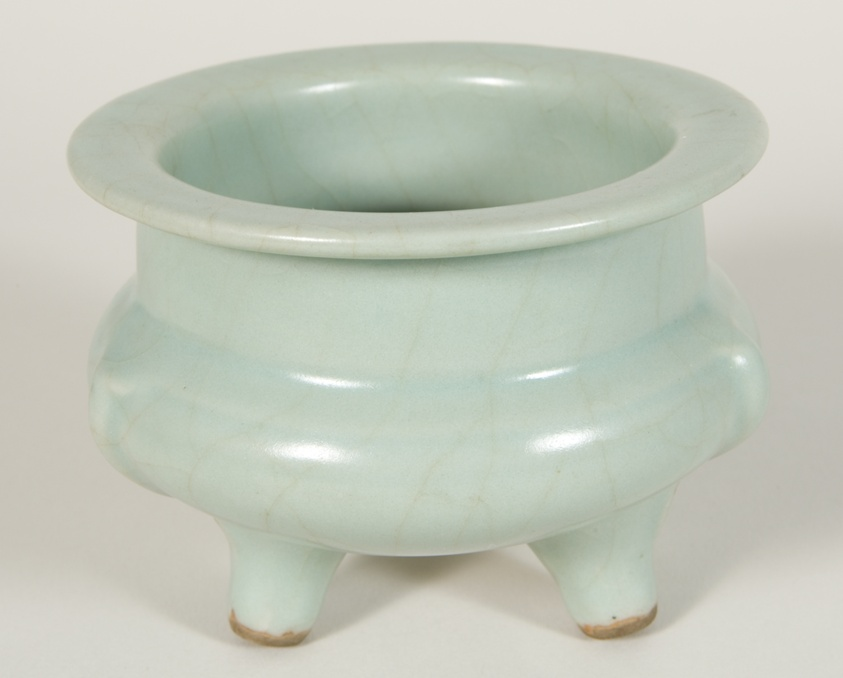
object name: Vessel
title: Cylindrical Tripod Censer (Incense Burner) with Cloud-Scroll Feet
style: Chinese (culture or style)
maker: China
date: Southern Song dynasty (1127–1279)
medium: Longquan ware; glazed stoneware with underglaze molded decoration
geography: China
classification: ceramics; vessel